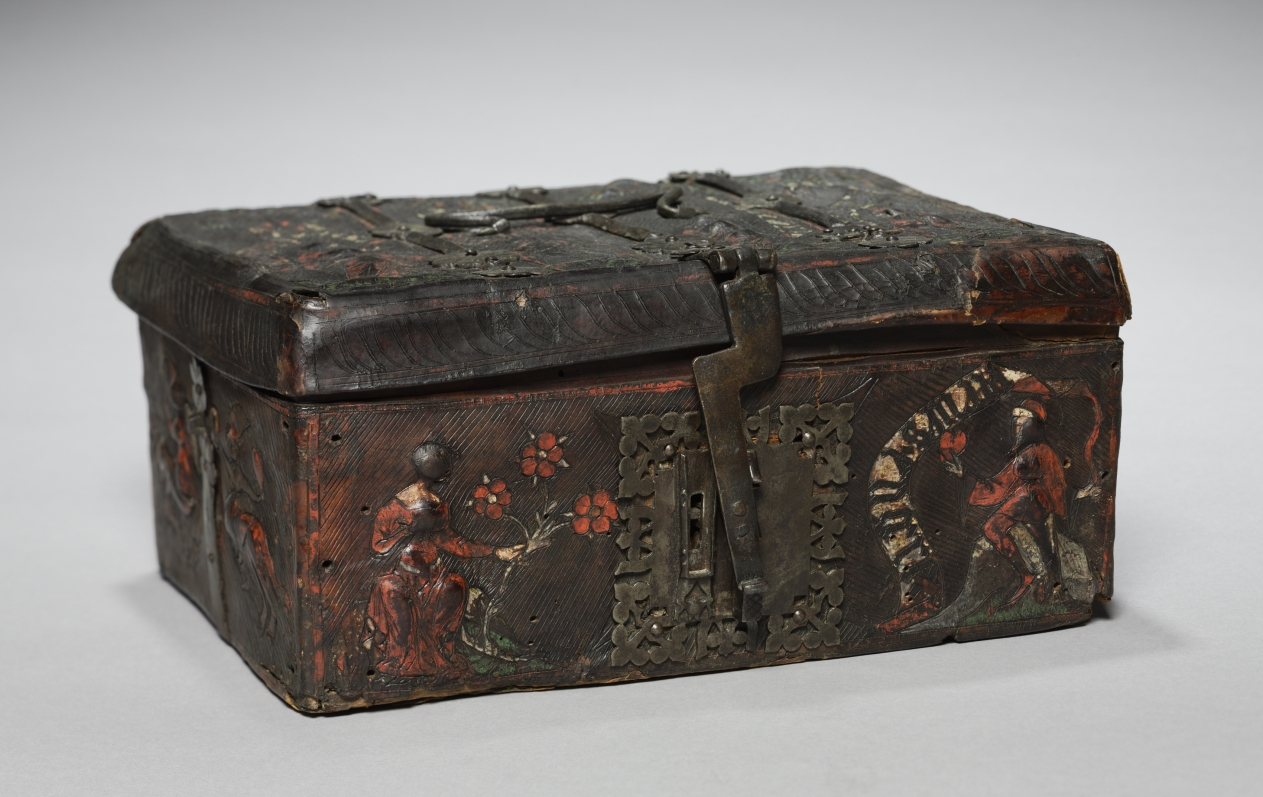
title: Leather Casket with Scenes of Courtly Love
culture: France, Gothic period, 2nd half of the 14th century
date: c. 1350–1400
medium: Leather: embossed, incised; iron mounts; wood core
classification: Leather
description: During the Middle Ages, small boxes like this were produced for the secular market. Used for storing personal items, the boxes typically consisted of a wood core that might be decoratively painted and gilded or covered with another material, such as ivory or leather. Manufactured in small, highly specialized leather workshops, these richly embellished caskets were valued furnishings in the homes of the aristocratic clientele that commissioned them. On the lid of this box, a couple is shown with banderoles inscribed in Old French with expressions of mutual love. "Hold my heart," requests the lady. "But you already have it," replies the man. On the front of the casket, the man, holding a heart, appears again and states, "Have it once more."